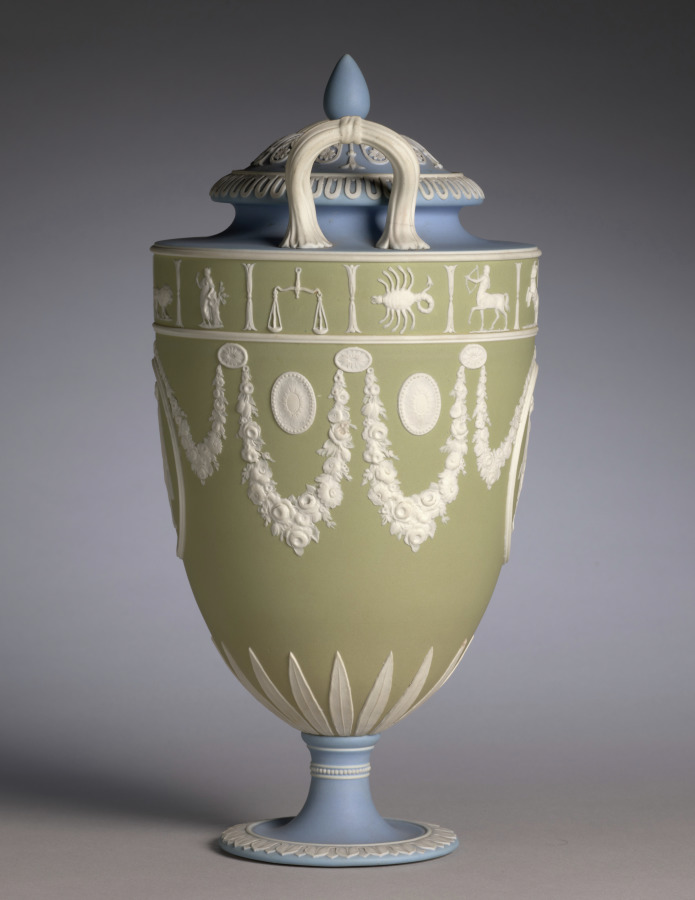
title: Covered Vase (one of a pair)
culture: England, Staffordshire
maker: Josiah Wedgwood and Sons (British, Staffordshire, est. 1759)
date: c. 1850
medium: jasper ware with relief decoration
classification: Ceramic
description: Wedgwood's tricolor jasperware first became popular in the 1770s during a period of fascination with neoclassical decoration. This vase was probably made around 1850 during the period when this type of decoration was revived. The relief medallions depict two versions of the Greek god Apollo, the god of music, next to his harp or lyre.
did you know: Signs of the zodiac form a decorative border around the upper portion of this vase.